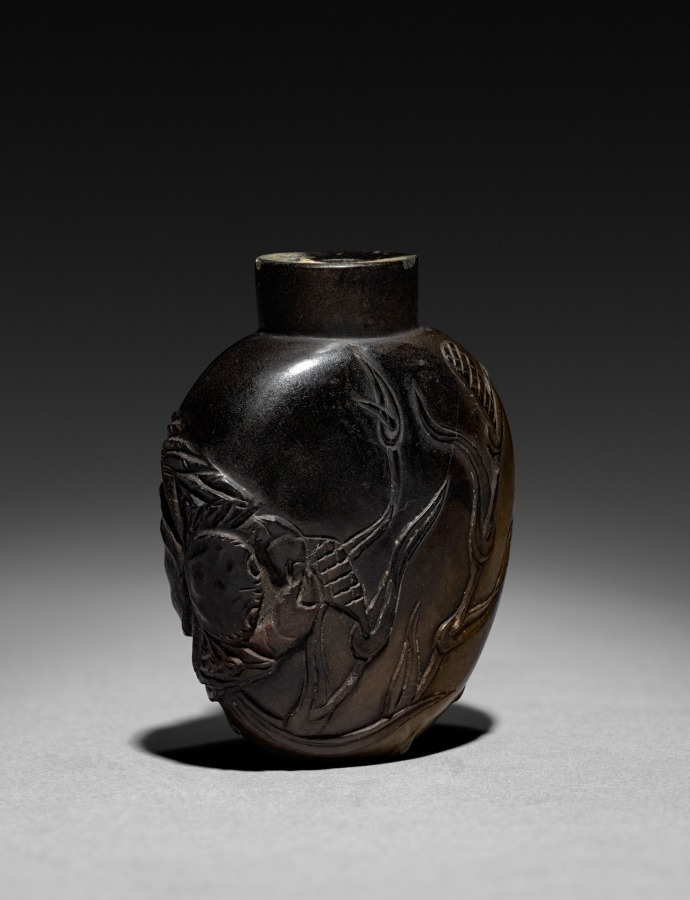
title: Snuff Bottle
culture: China, Qing dynasty (1644-1911)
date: 1800s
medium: glass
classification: Glass